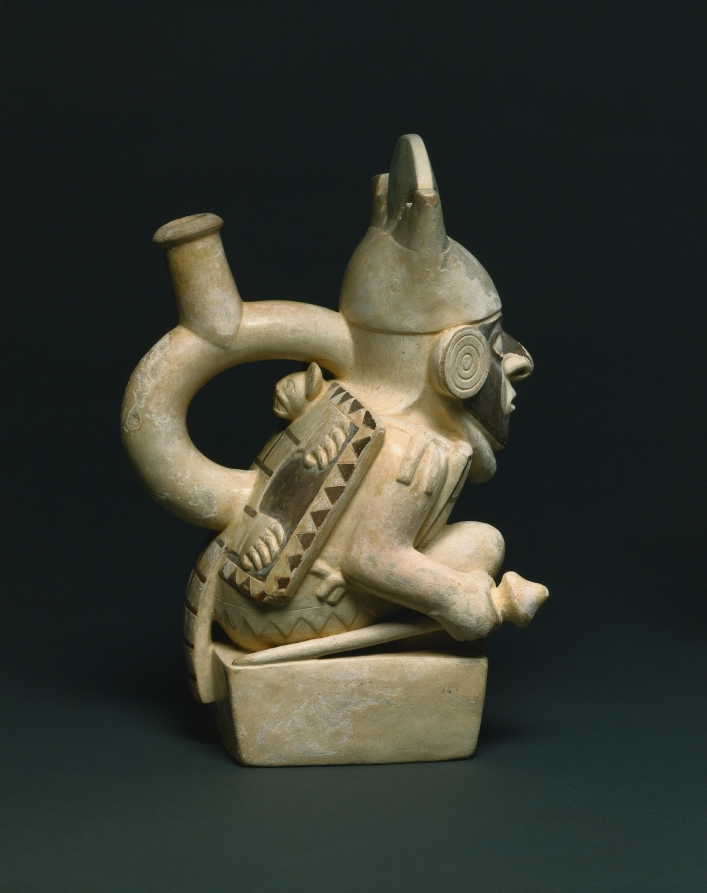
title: Warrior Vessel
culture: Peru, North Coast, Moche, Moche style (50-800)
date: c. 50–200 CE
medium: earthenware with colored slips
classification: Ceramic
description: This vessel's exquisite, crisp detail rewards careful viewing. The modeling of the feline pelt on the back is especially delicate and sharp, and each of the squares on the tunic carries a tiny dot in the upper corners, as though the squares represent plates of metal or shell attached to fabric. The face is decorated with paint or tattooing, and the headdress supports a curved, blade-shaped form.